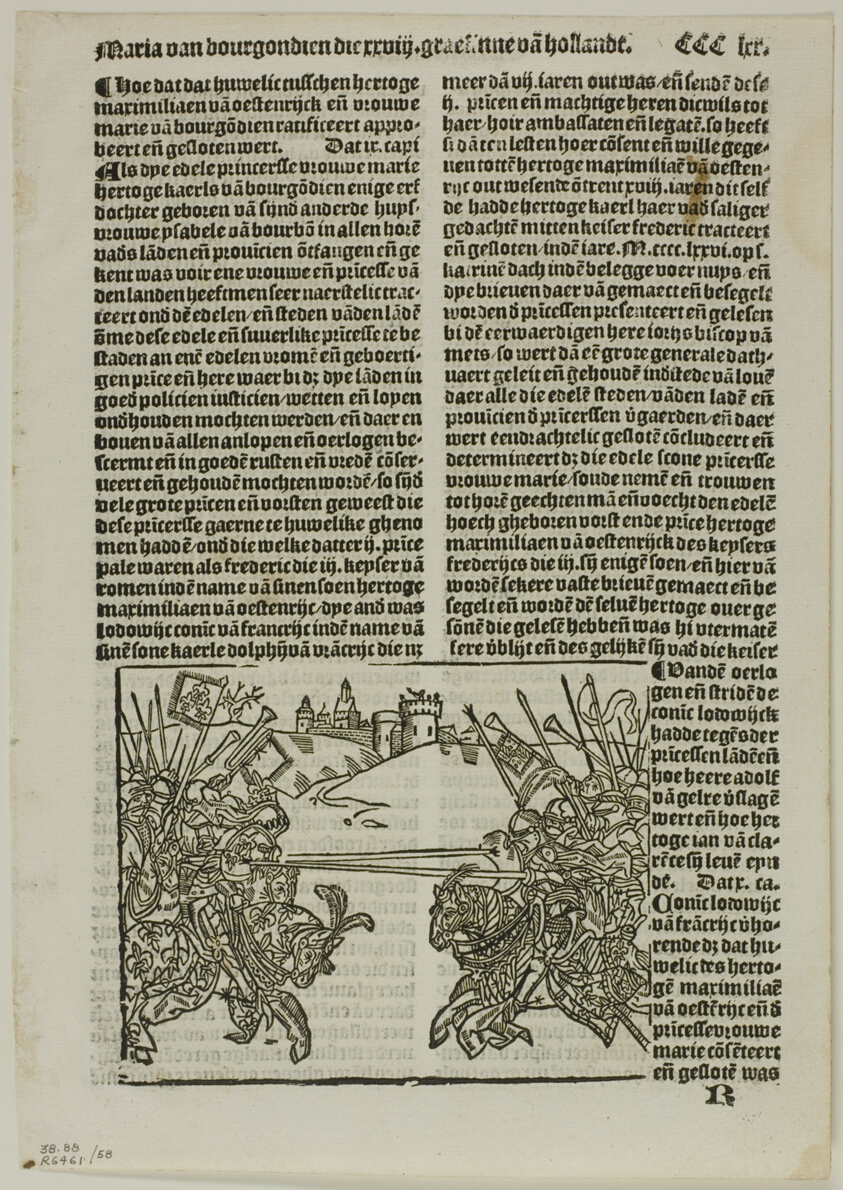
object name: Print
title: Illustration from Coronijke van Hollandt, plate 58 from Woodcuts from Books of the XVI Century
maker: Unknown Artist (German, 16th century); assembled by Max Geisberg (Swiss, 1875-1943)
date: 1530, assembled into portfolio 1937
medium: Woodcut on paper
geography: Germany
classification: woodcut; print; prints and drawing